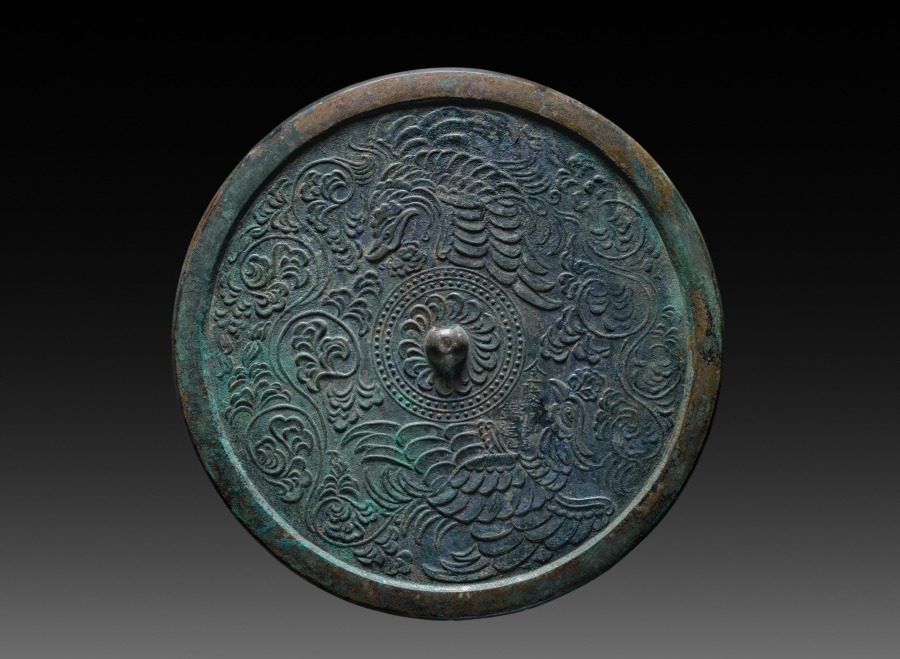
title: Mirror with a Pair of Phoenixes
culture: China, Song dynasty (960–1279)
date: 1100s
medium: bronze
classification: Metalwork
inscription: Zhang Zigao from Jinling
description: This exceptionally large bronze mirror features magnificently long-tailed phoenixes with cloud scrolls, motifs that can also be seen on the silk boots nearby. While the mirror, according to its inscription Zhang Zhigao from Jinling (Nanjing) was made in southeast China, the boots were made in the northern part of China then occupied by the Khitan people. The inscription is placed to the right of the mirror’s central knob. Mirrors typically have one polished and one decorated side and were used in part in tombs for ritual purpose or served as disks for reflection.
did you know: A union of male and female birds, the phoenix often symbolizes the yin and yang of Chinese philosophy, which equates to universal balance and harmony.